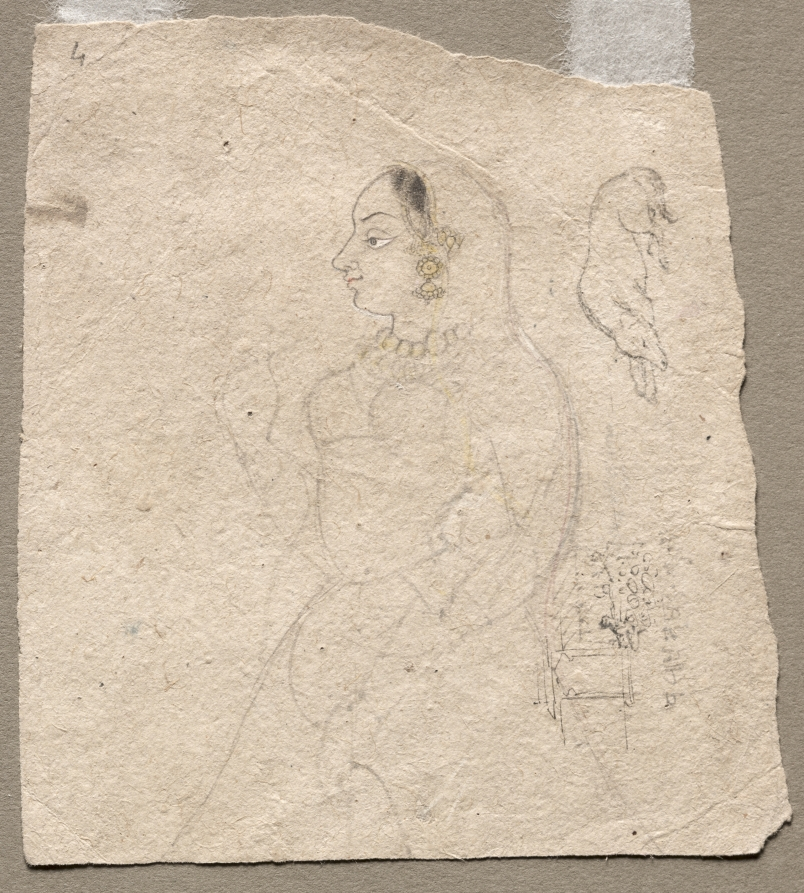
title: Sketch of a Woman with an elephant and other animals on reverse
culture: India, Pahari, 18th century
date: 1700s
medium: pencil and ink on paper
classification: Drawing